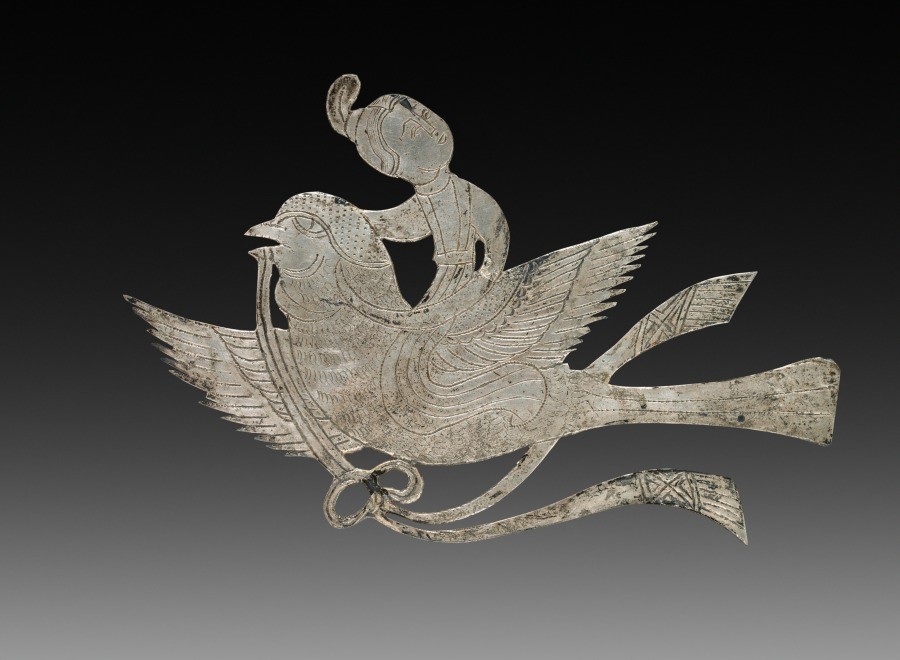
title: Inlay for a Mirror or Box: Lady on a Bird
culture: China, Tang dynasty (618-907) - Song dynasty (960-1279)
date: c. 900–1000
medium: beaten silver with chased details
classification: Metalwork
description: The p'ing-t'o technique of inlaying gold and silver foil on lacquer produced luxurious articles of elegance and fragility. These stray silver inlays were originally mounted on a mirror back or a cosmetic box whose lacquered surface has disintegrated. They combine auspicious symbols of Indian and Chinese origin--human-headed birds whose melodies filled the Buddhist paradise, and bird-riding deities who inhabited the skies of Taoist mythology. Like these imaginary beings, the lions were probably paired in a radial design; at least one has been lost.